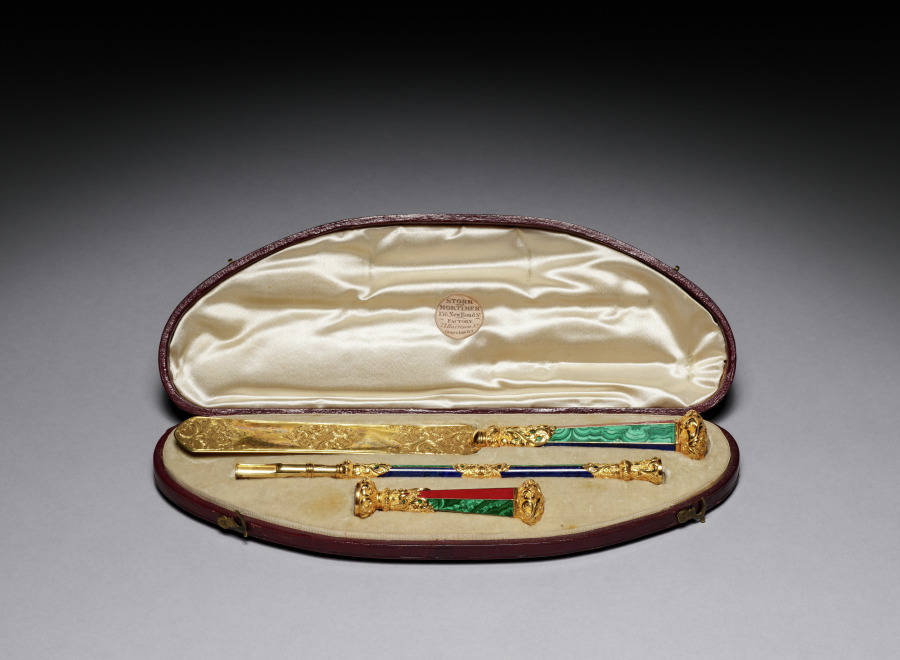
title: Writing Set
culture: England, mid-19th century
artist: John Hamilton Mortimer (British, 1740–1779)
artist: and Paul Storr (British, 1771–1844)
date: c. 1830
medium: hardstones including lapis lazuli, malachite, carnelian, agate, gold; original fitted velvet-lined case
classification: Miscellaneous